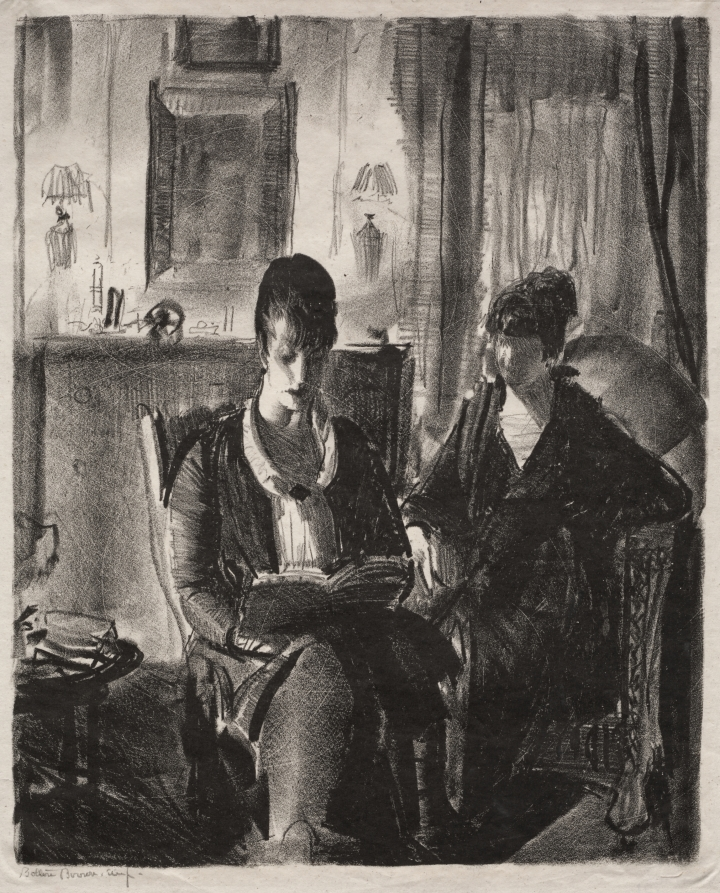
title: Elsie Reading to Emma, First Stone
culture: America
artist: George Bellows (American, 1882–1925)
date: 1921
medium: lithograph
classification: Print